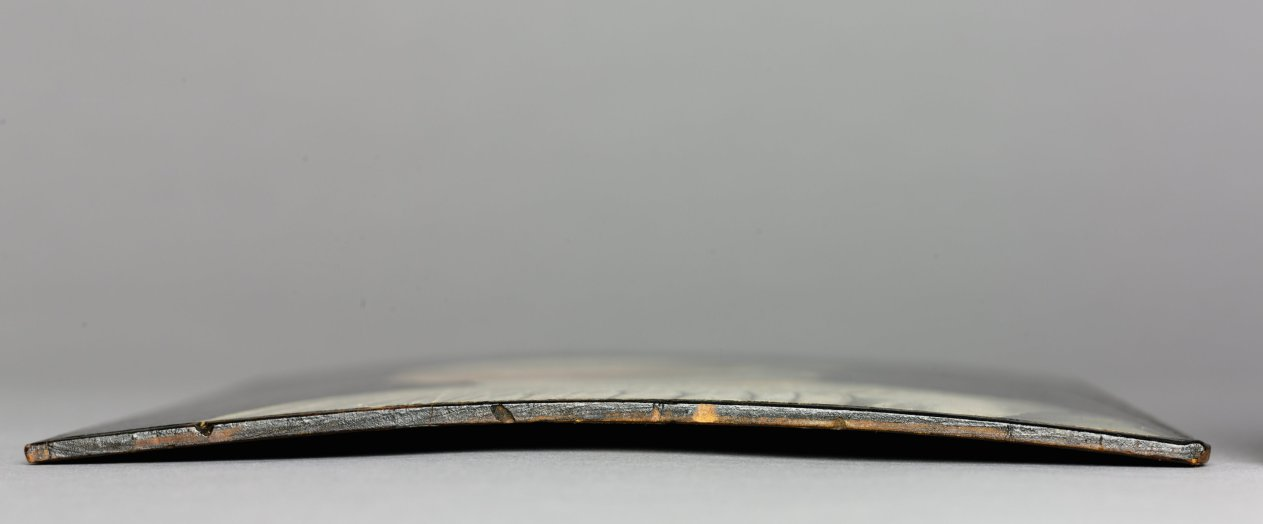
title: Portrait of a Woman, Possibly a Novice of San Secondo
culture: Italy, 15th century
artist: Jacometto Veneziano (Italian, 1497)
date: c. 1490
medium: oil on wood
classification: Painting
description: Scholars have recently speculated that this work does not actually depict a nun, although it has been described as such since 1543. A beautiful young woman presented as saintly, a regular occurrence, the sitter may be the wife or daughter of Alvise Contarini. Her attire, particularly the head garb, may be secular, while some scholars consider it to be Benedictine or Dominican. The San Secondo convent was reserved for daughters of the wealthiest Venetians and conventions of dress were fairly loose until 1515 when strict reforms were enforced by religious and political authorities in Venice.